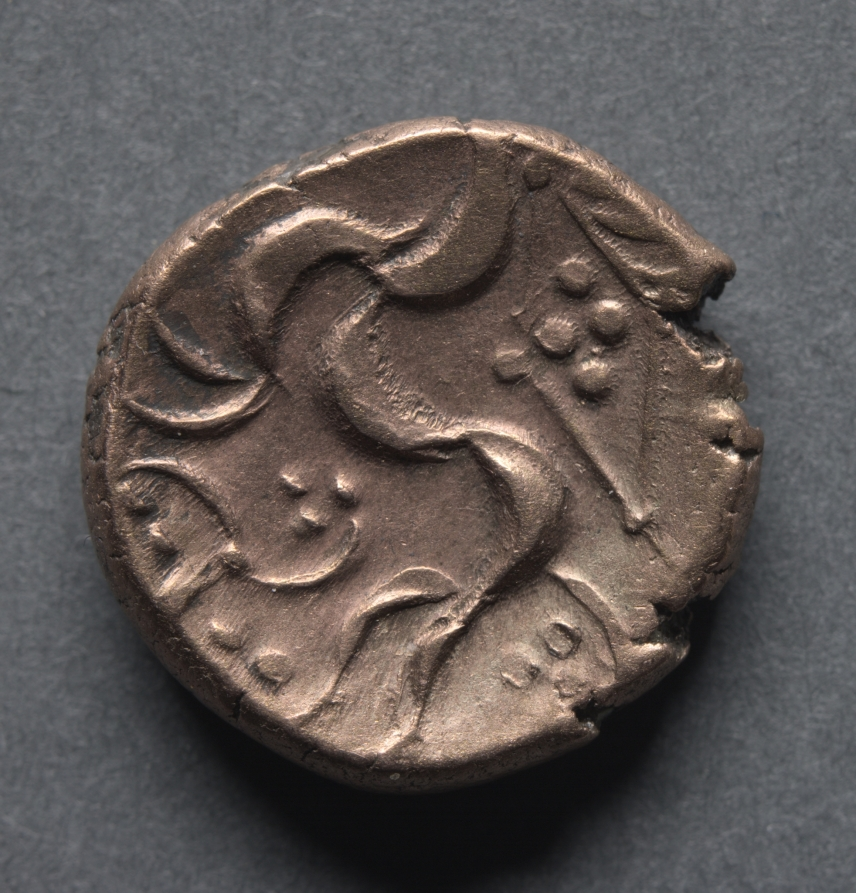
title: Stater: Horse and Diamond (reverse)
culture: England, Corieltauvi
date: 10 BCE–30 CE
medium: gold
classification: Coins